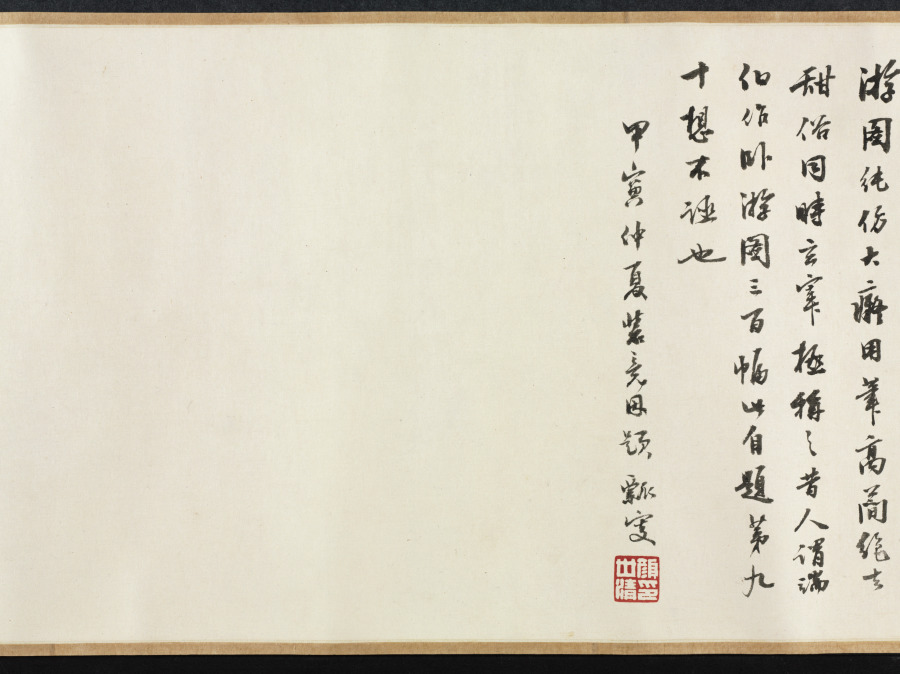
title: Dream Journey among Rivers and Mountains, no. 90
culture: China, Qing dynasty (1644-1911)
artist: Cheng Zhengkui (Chinese, 1604–1676)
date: 1658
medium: Handscroll; ink and color on paper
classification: Painting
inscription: 江山臥遊圖其九十, 青溪道人, 戊戌夏五。 [印] 程正揆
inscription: Title and inscription by Huang Yi 黃易 (1744–1802), and 3 seals.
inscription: 1 colophon and 9 additional seals: 3 seals of Dai Zhi 戴植 (active about 1821–1850); 1 colophon, dated 1914, and 3 seals of Yan Shiqing 顏世清 (1873–1929); 3 seals of Wang Nanping 王南屏 (1924–1985).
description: Cliffs and waterfalls interspersed with trees and dotted vegetation are spread over this handscroll. Long paths wind their way through villages, beside cottages, shrines, and over bridges. In the past, Chinese literati officials liked to take a “dream journey” along mountains and rivers when viewing landscape paintings in their studios. Scenery of this kind thus became a way to escape from the world of bureaucracy and administration. The painter Cheng Zhengkui used the title “Dream Journey” for a whole series of paintings, of which this is number 90. He is said to have painted 500 of them, but the actual count remains unknown.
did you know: Cheng Zhengkui planned to make 100 dream journey paintings but may have ultimately made 500.